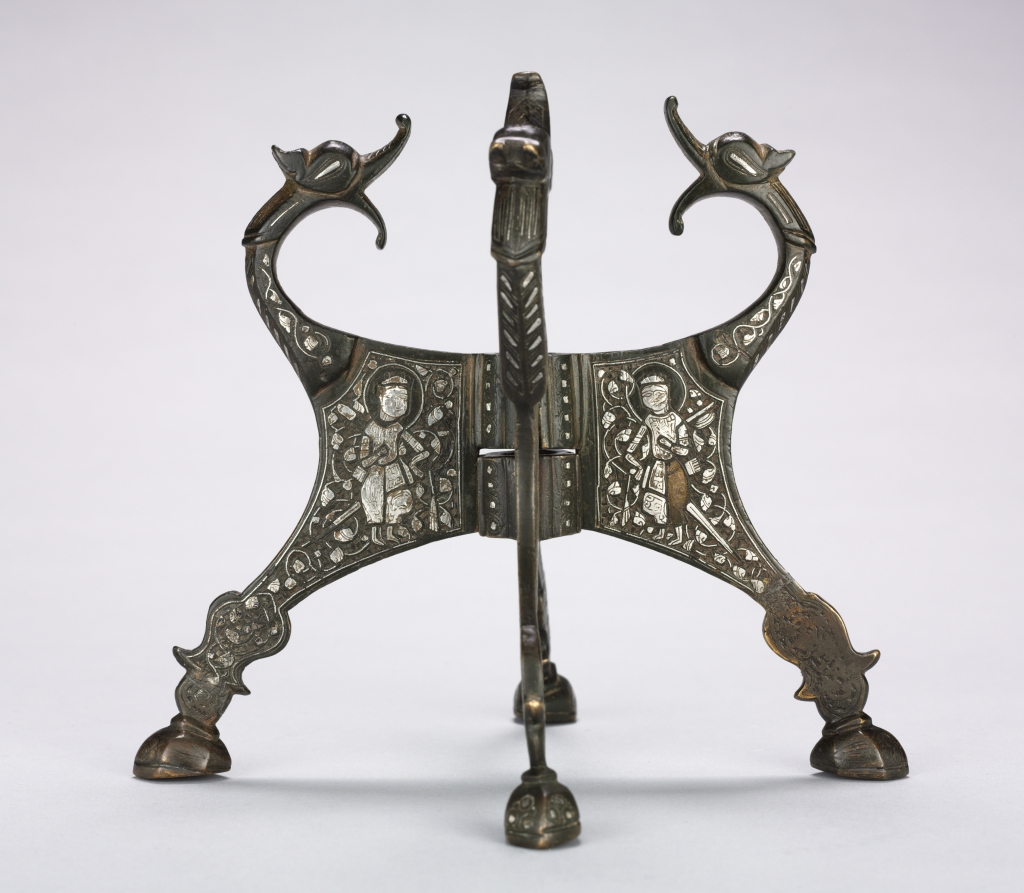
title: Dragon-headed Stand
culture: Northern Iraq or Syria, Zangid (1127–1251) or Ayyubid period (1171–1260)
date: 1200s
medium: cast brass inlaid with silver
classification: Metalwork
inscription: None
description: Themes of hunting and combat are evoked by this stand with gaping dragon heads and figures armed with swords and spears.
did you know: The four-legged stand has two interlocking parts.